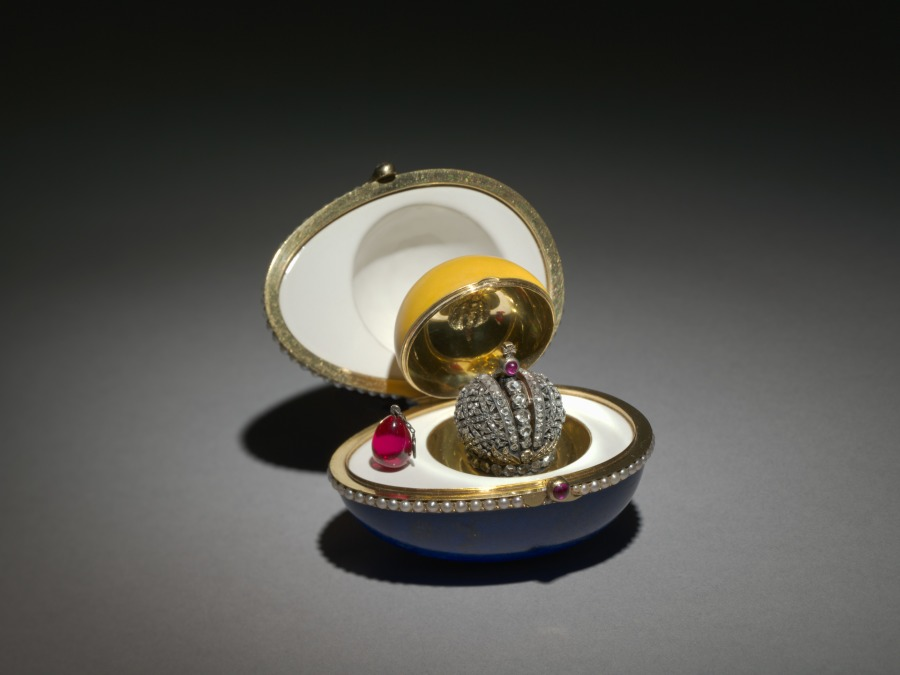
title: Lapis Lazuli Easter Egg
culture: Russia, St. Petersburg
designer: attributed to Peter Carl Fabergé (Russian, 1846–1920)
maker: attributed to House of Fabergé (Russian, 1842–1918)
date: c. 1885–90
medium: gold, enamel, lapis lazuli, pearls, diamonds, rubies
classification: Miscellaneous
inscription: Unmarked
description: Peter Carl Fabergé became the crown jeweler to the imperial court of Russia in 1885 after he produced the very first Easter egg for Tsar Alexander III to give to his wife, Empress Marie Feodorovna. Fabergé created his celebrated Easter eggs, symbols of rebirth and renewal, as gifts for the Russian imperial family every year until he had to leave the country in 1919 after the Russian Revolution. Made of gold and lapis lazuli from the Ural Mountains, this egg opens to reveal a compartment enameled to resemble an egg yolk, which contains yet another delightful surprise of an imperial crown holding a tiny ruby or pink sapphire on a chain.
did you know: This egg may have been made for one of the tsar's relatives very early in the run of imperial Easter egg production by Fabergé.